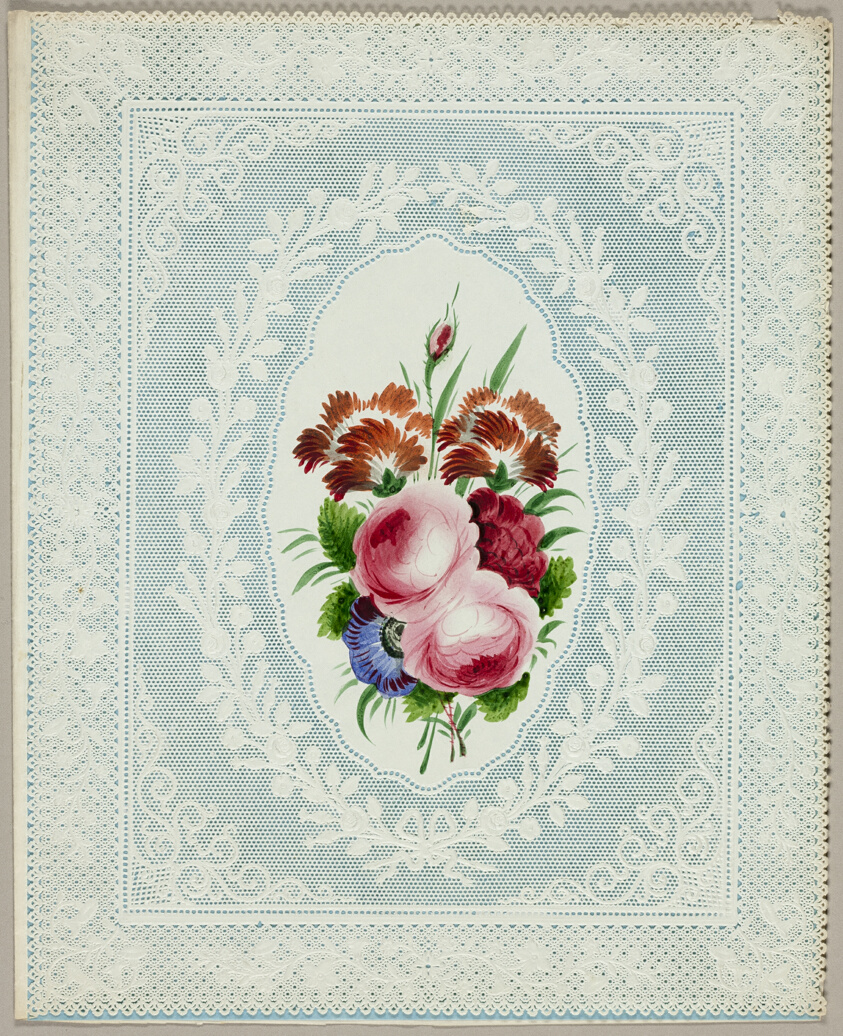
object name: Drawing and Watercolor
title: Untitled Valentine (Flowers on Lace)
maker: Unknown Artist; English, 19th century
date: c. 1840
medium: Watercolor on cut and embossed ivory wove paper (lace, folded), with blue wove paper insert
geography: England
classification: valentine; prints and drawing; paper